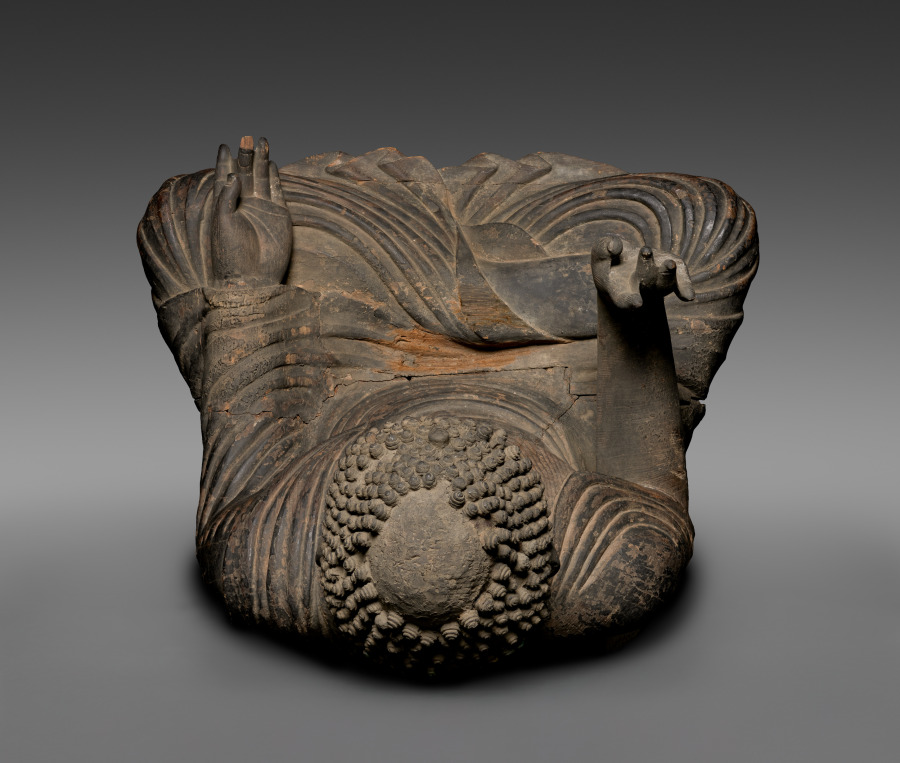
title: Shakyamuni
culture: Japan, Heian period (794–1185)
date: c. 900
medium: wood with lacquer and traces of color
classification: Sculpture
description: This image of Shakyamuni, the Buddha, or “awakened one,” who lived during the 500s or 400s BCE, is carved from one piece of wood. The distinctive pattern of thick, raised garment folds is characteristic of Japanese Buddhist sculpture of the 800s and 900s. Shakyamuni’s elongated ears and curled hair are among the physical attributes described in sacred texts that distinguish him as a Buddha.